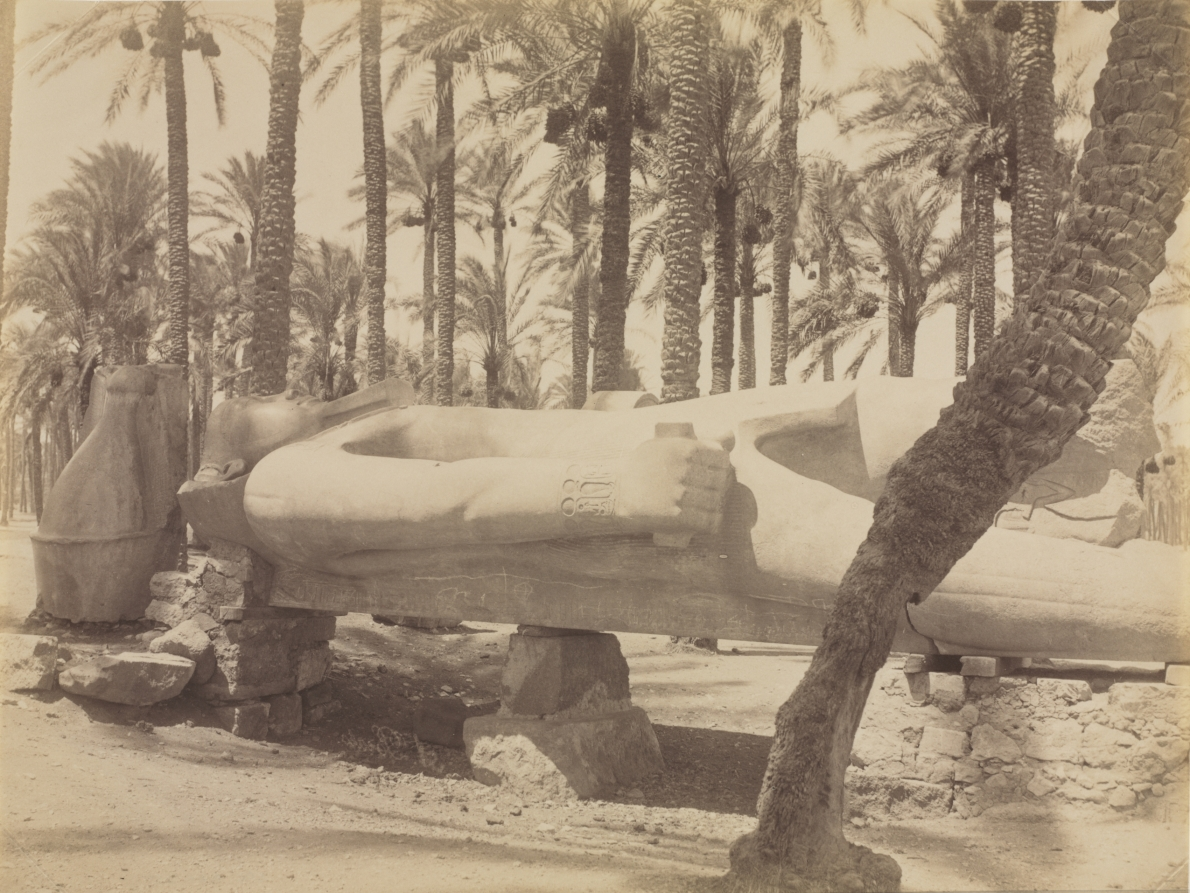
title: Statue of Ramesses at Saqqara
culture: England, 19th century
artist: Antonio Beato (British, c. 1825–1903)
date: c. 1870s - 1880s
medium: albumen print from wet collodion negative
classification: Photograph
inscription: Written in pencil on verso: "376/Statue de Ramses à Saggarah"; "AB-5301-Z"